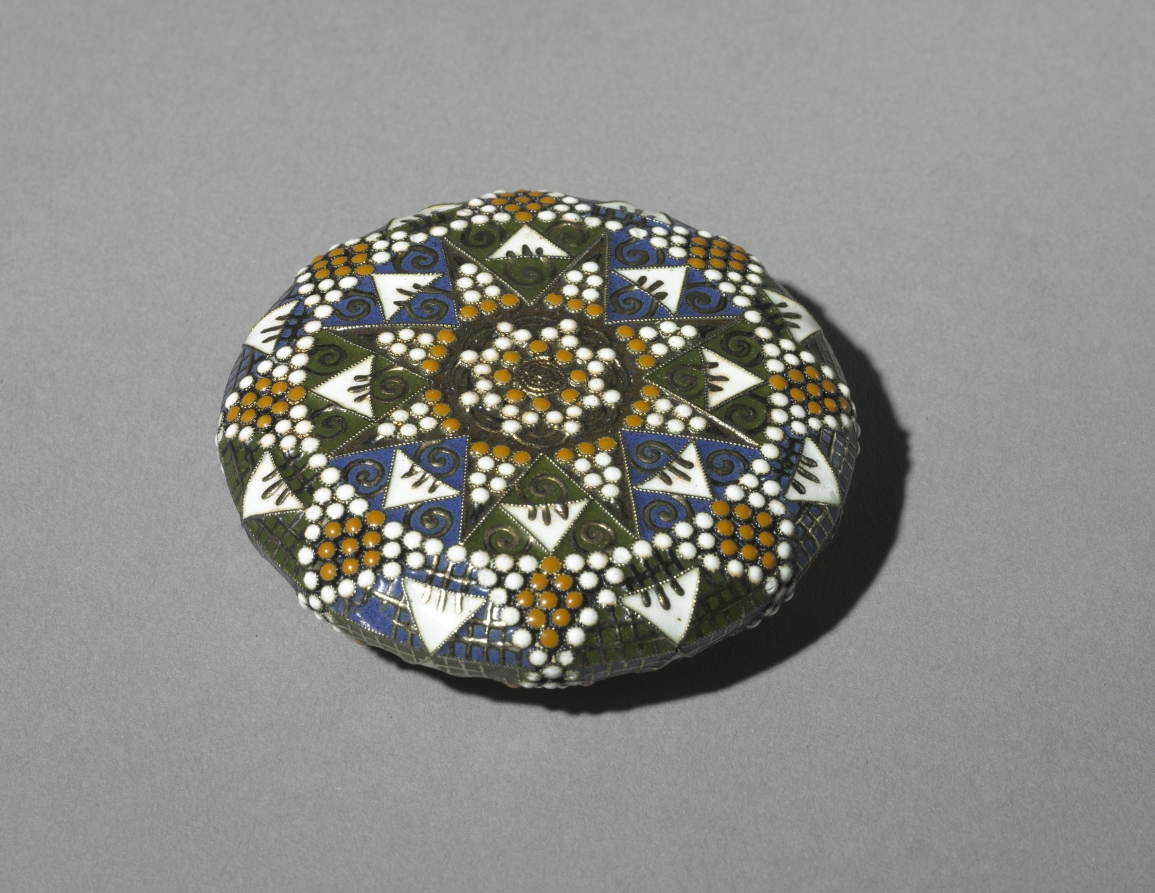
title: Pill or Snuff Box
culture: Russia, St. Petersburg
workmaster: attributed to Feodor Ivanovich Rückert (Russian, 1840–1917)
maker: House of Fabergé (Russian, 1842–1918)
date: 1906–16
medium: silver gilt and enamel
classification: Miscellaneous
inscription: Marks: Kokoshnik (?), tester's initials [assay mark of Moscow, 1908-26]; 88; C. Fabergé (in Cyrillic); double-headed eagle [imperial warrant]; scratched 25477.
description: Fabergé’s craftsmen in Moscow became known for their work in the pan-Slavic or neo-Russian taste, hearkening back to 17th-century styles of Russian folk decoration. This little box for pills, snuff, or cosmetic patches follows on in this style with its scene of a romantic ride in the quintessential mode of Russian transportation, a horse-drawn sleigh or troika.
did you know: Around 1900, ladies often carried little boxes for medicines, a pinch of snuff, or cosmetic patches for the face.